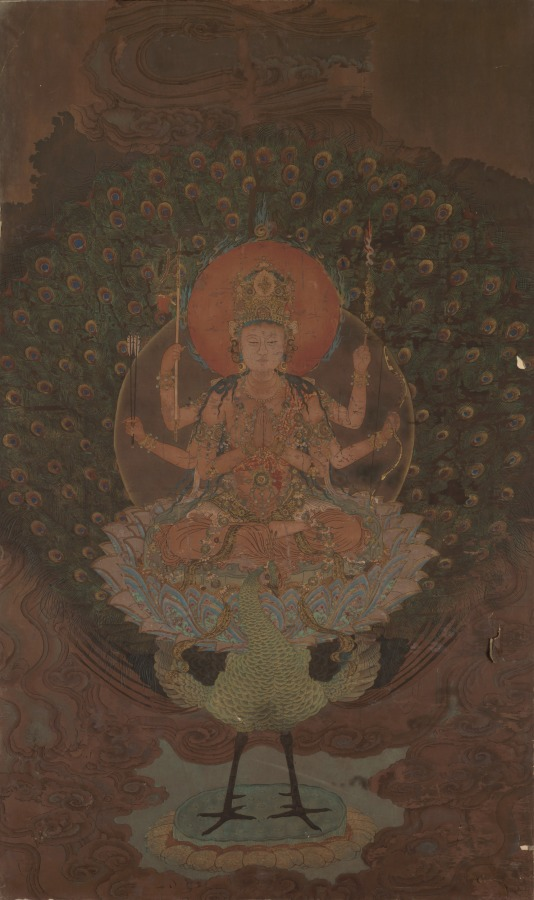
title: Mahamayuri (Kujaku Myoo)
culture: Japan, Meiji period (1868–1912)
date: 1868?-1912?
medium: painting on paper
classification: Painting